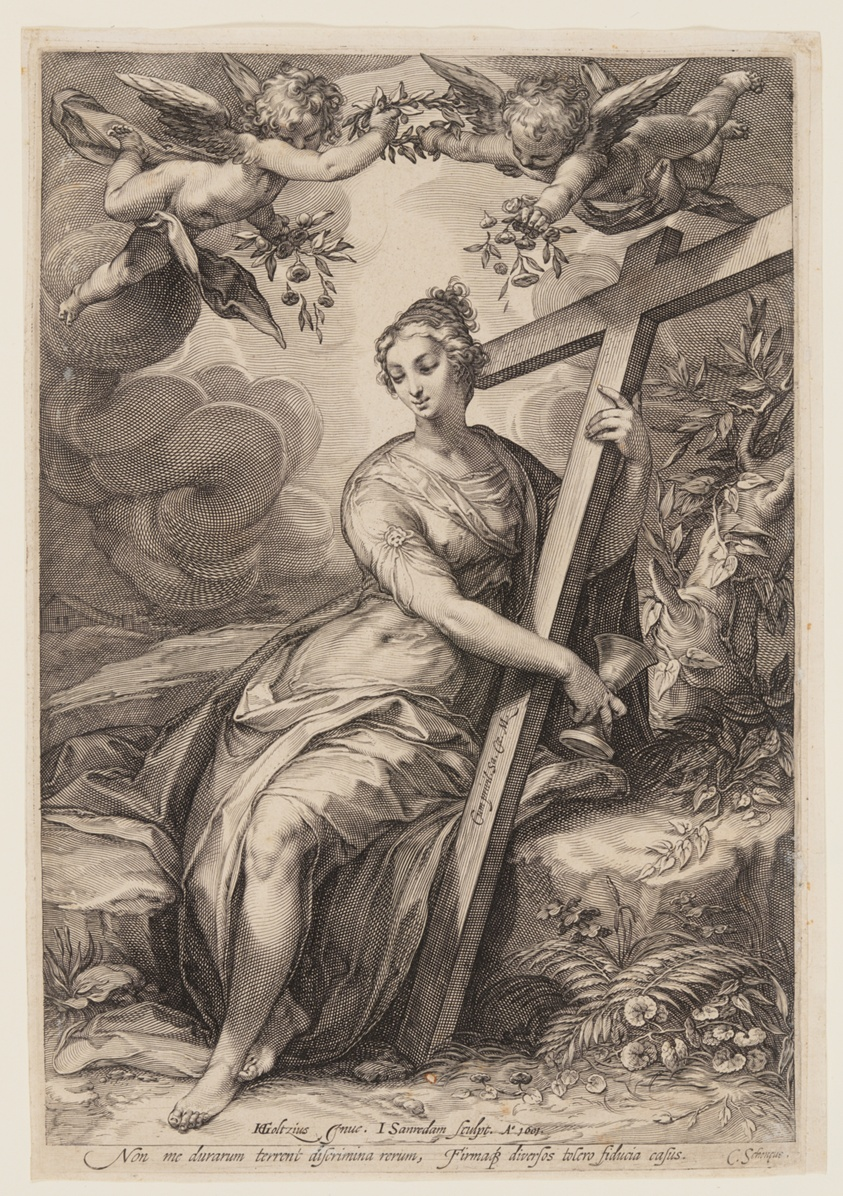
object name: Print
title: Faith, from Three Cardinal Virtues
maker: Jan Saenredam (Dutch, 1565–1607); after Hendrick Goltzius (Dutch, 1558–1617)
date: 1601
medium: Engraving on ivory laid paper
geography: Netherlands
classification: engraving; paper; print; prints and drawing